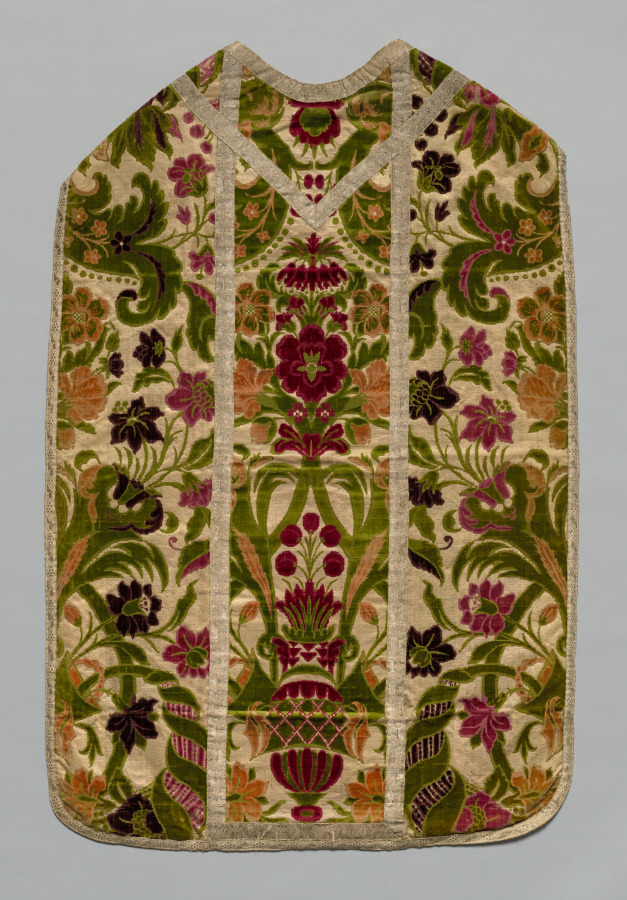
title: Chasuble, Stole, Burse (Corporal Case), and Maniple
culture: Italy, Genoa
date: 1600s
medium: woven polychrome silk and gilt metal threads, cut and uncut velvet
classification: Velvet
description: This sumptuous polychrome velvet displays a central vase with abundant flora and exotic leaves flanking curving blossoming fronds on a gilt-metal thread ground. The pattern was created with five colors of cut and uncut (loops) velvet pile. Only the pile warps for the lush green velvet occur across the entire cloth, while each additional color appears in vertical stripes—crimson, peach, rose, and purple. These widely acclaimed velvets from Genoa were the most colorful woven in Europe. Both the long stole and the shorter maniple are insignia of the office of deacons, priests, and the higher clergy. The stole was worn under a chasuble according to the office and the maniple was hung on the left forearm. The burse is a stiff receptacle in which the folded corporal, a white linen cloth on which the sacred bread and chalice are placed during the Mass, is carried to and from the altar. The upper fabric matches the chasuble, the bottom is a plain silk, and the interior has an obligatory linen lining.